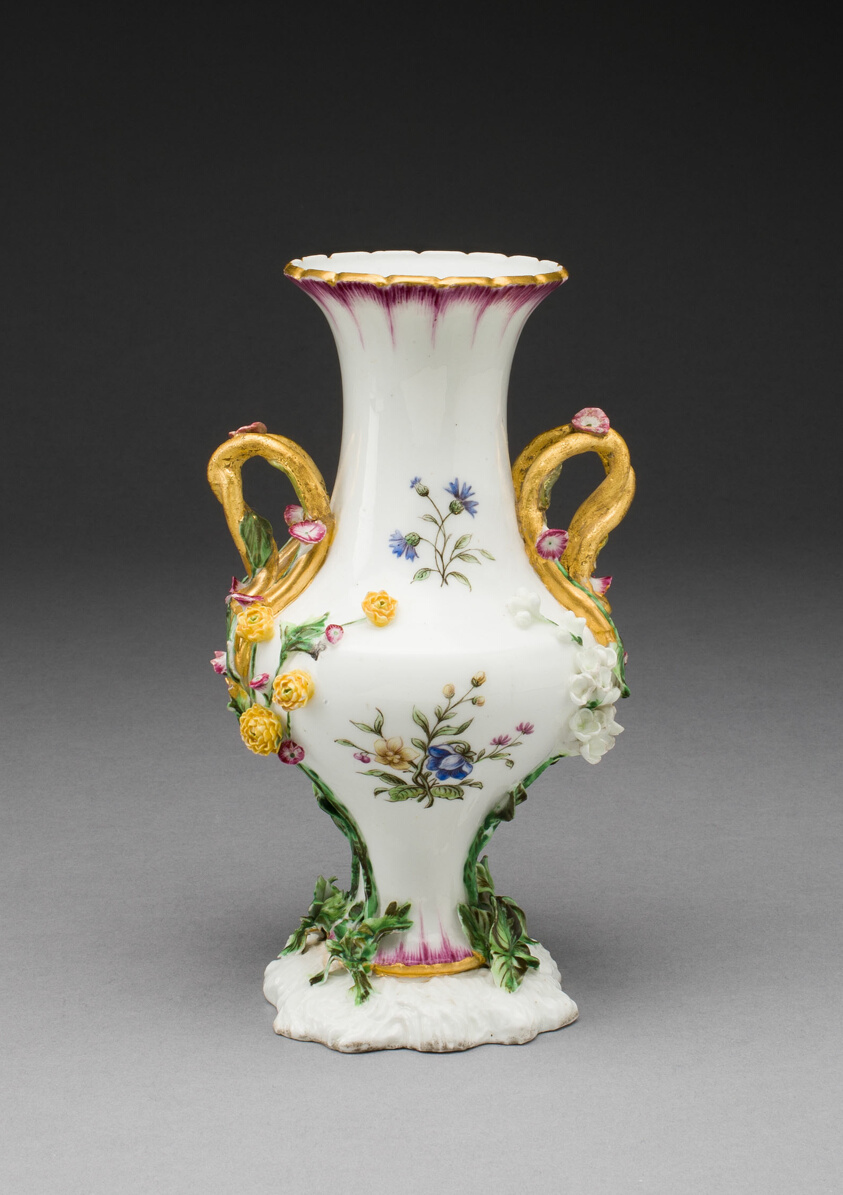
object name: Ceramics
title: Vase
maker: Designed by Jean-Claude Duplessis (French, c. 1695–1774); Vincennes Porcelain Manufactory (French, 1740–1756, after became Sèvres Porcelain Manufactory)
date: c. 1749–52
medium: Soft-paste porcelain, polychrome enamels, and gilding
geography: Vincennes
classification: vase; porcelain; vessel; european decorative arts; ceramics